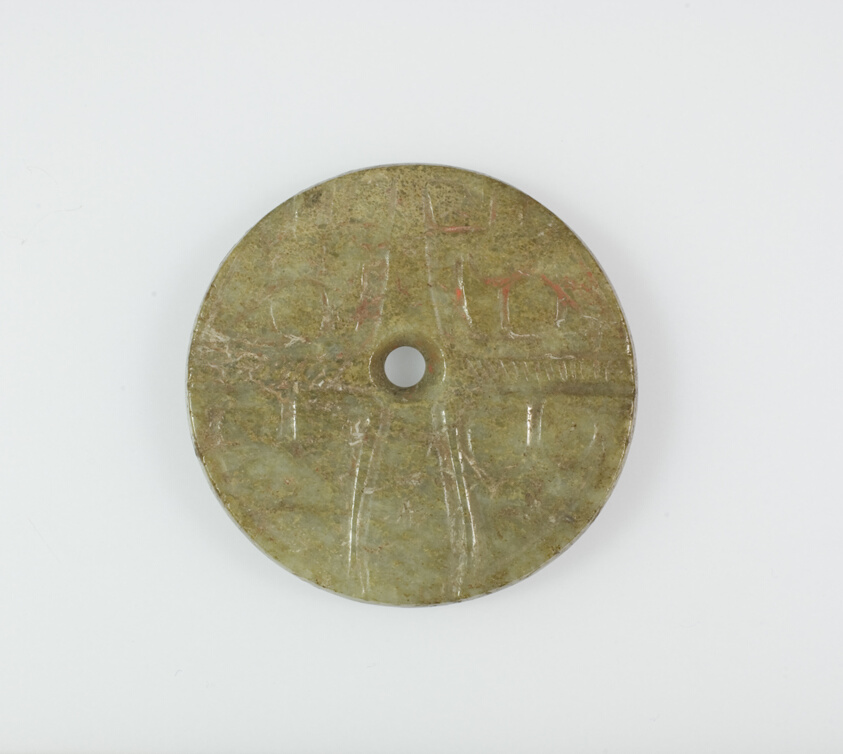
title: Disc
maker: China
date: Shang dynasty (c.1600–1046 BCE)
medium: Jade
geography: China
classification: jade; asian art